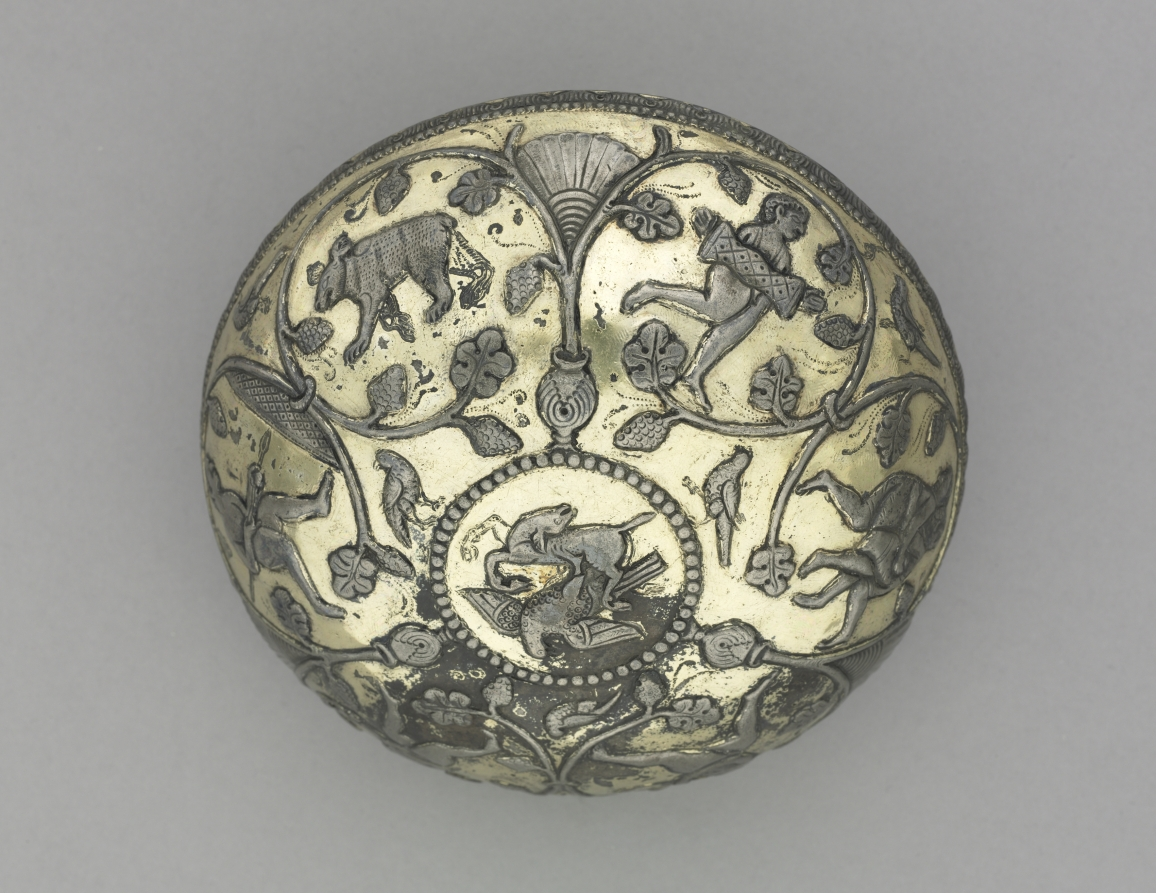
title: Bowl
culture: Iran, Sasanian Empire (224–651 CE)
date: 500–700 CE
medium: silver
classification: Metalwork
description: Every good Zoroastrian was supposed to spend one-third of his day farming; one-third philosophizing; and one-third eating, resting, and at pleasure. The abundance of Sasanian luxury goods is evidence of the importance accorded the last third of the day.